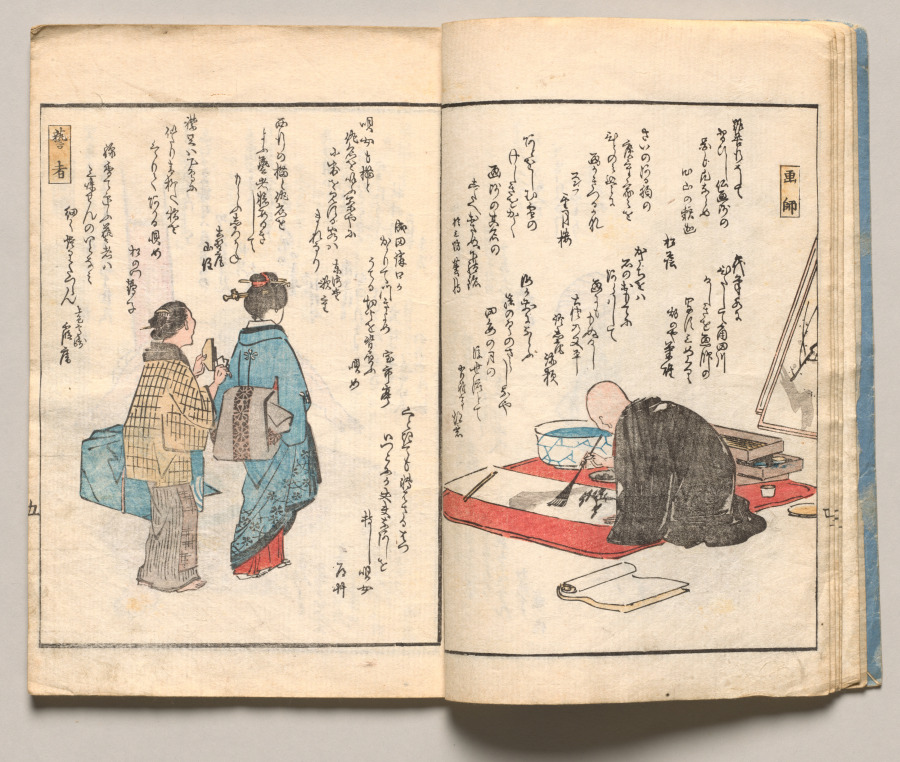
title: Spread Six from Volume One of People of Japan in Light Verse (Kyōka)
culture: Japan, Edo period (1615–1868)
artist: Utagawa Hiroshige (Japanese, 1797–1858)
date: 1857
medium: Woodblock-printed book; ink and color on paper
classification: Bound Volume